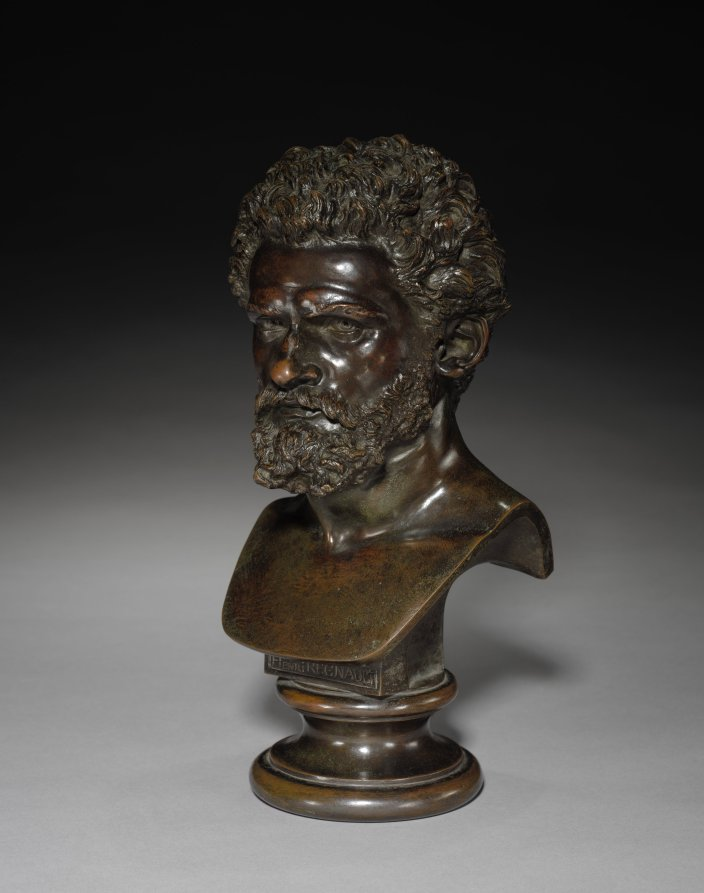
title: Henri Regnault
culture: France, 19th century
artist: Louis-Ernest Barrias (French, 1841–1905)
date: 1871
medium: bronze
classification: Sculpture